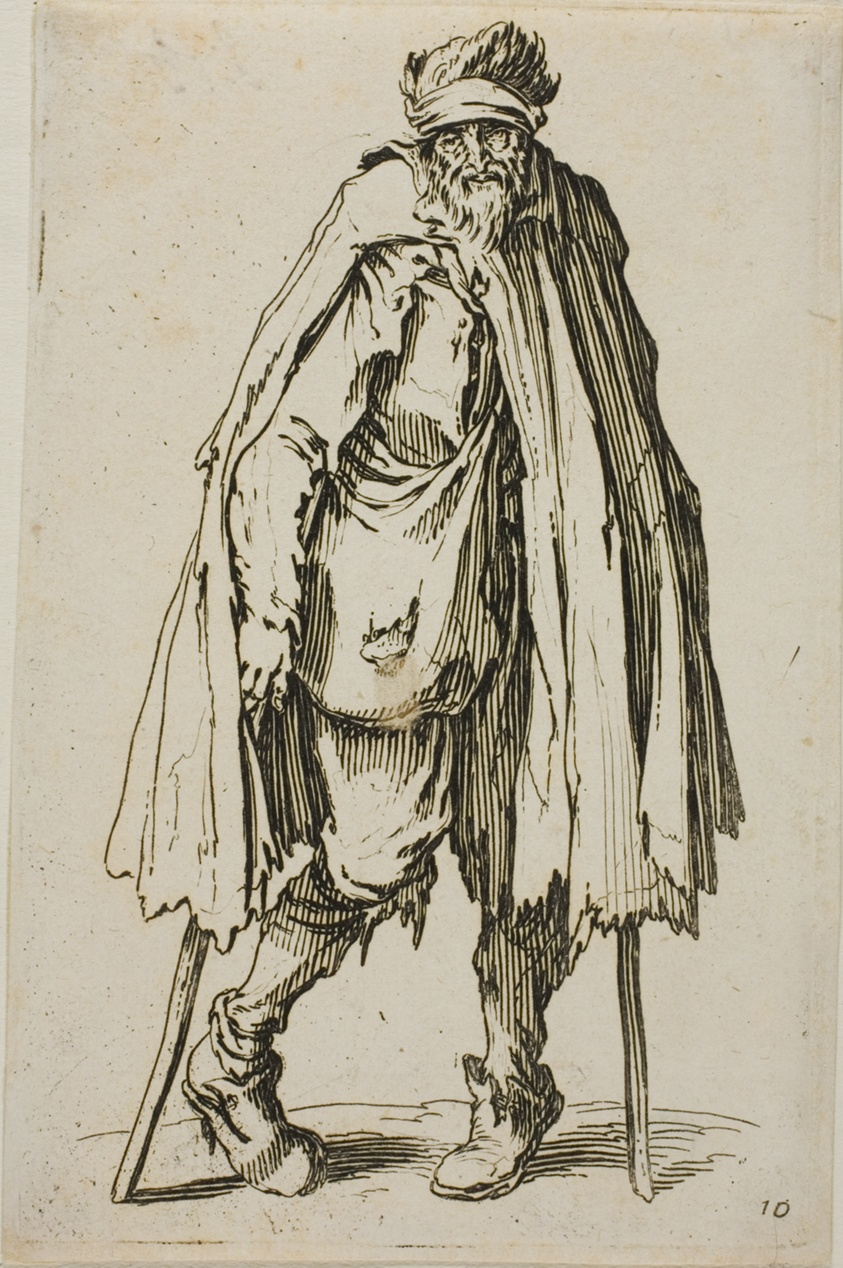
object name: Print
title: Beggar Leaning on a Stick, plate nineteen from The Beggars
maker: Jacques Callot (French, 1592-1635)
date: c. 1622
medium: Etching on paper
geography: France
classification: etching; print; prints and drawing